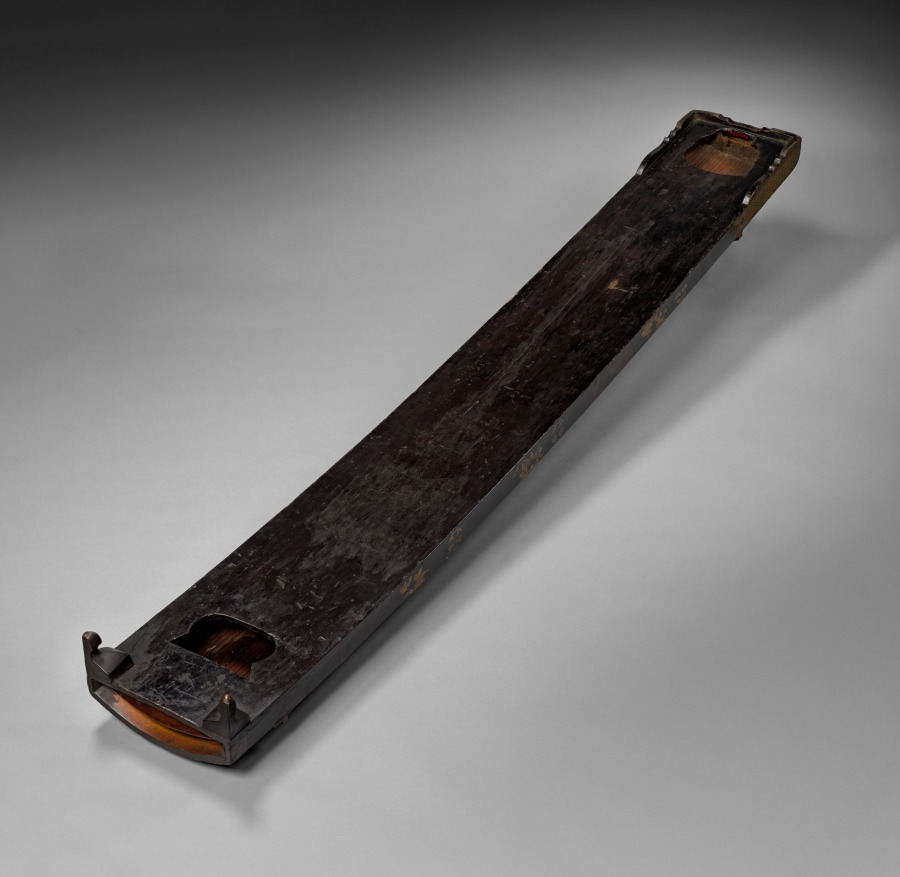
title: Koto (Zither)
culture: Japan, Edo period (1615–1868)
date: early 1600s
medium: gold, silver, and black lacquer on wood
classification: Lacquer